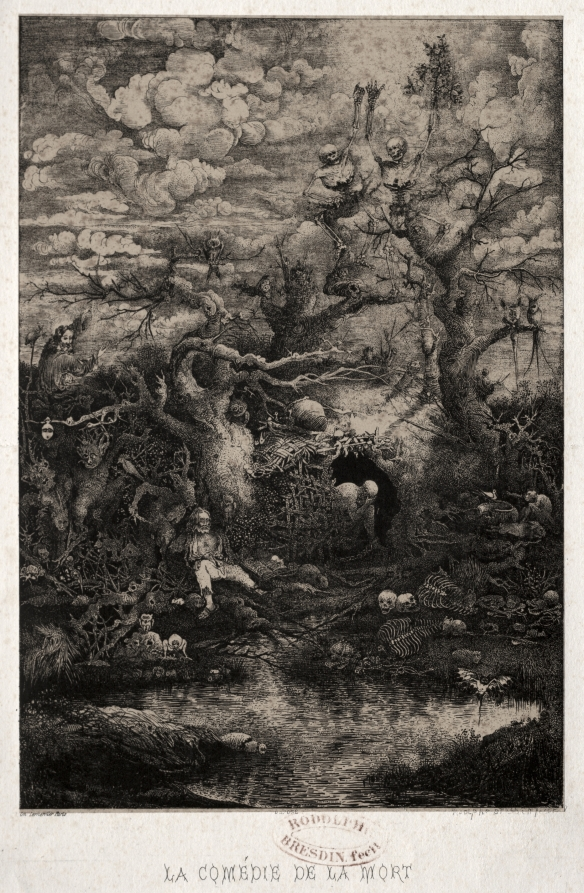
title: The Comedy of Death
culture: France, 19th century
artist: Rodolphe Bresdin (French, 1822–1885)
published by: Lemercier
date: 1854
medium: lithograph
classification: Print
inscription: signed, in stone, lower right: Rodophe [sic] Bresdin fecit.; lower left, in stone: Im. Lemercier Paris; lower center, in stone: DÉPOSÉ; lower center, in stone: LA COMÉDIE DE LA MORT